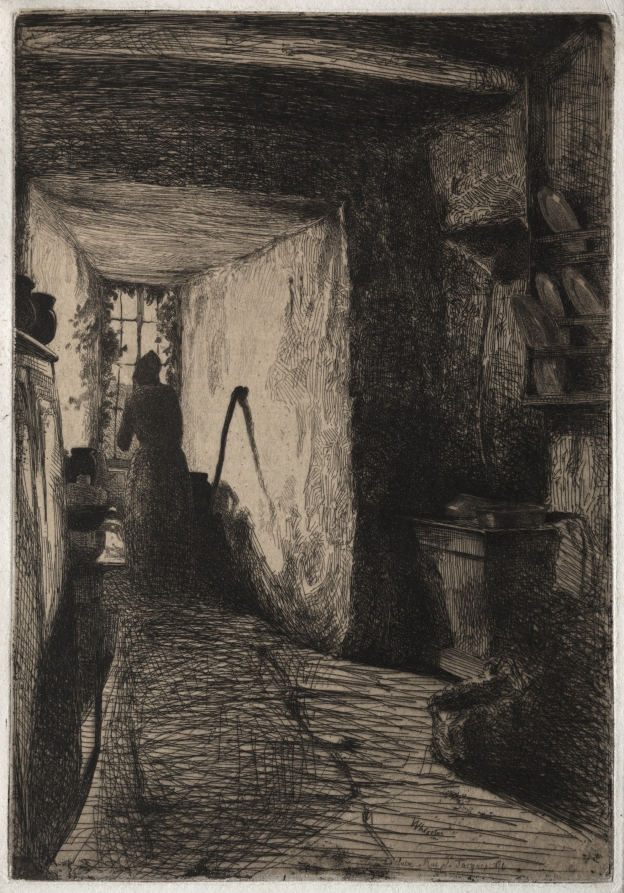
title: The Kitchen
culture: America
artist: James McNeill Whistler (American, 1834–1903)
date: 1858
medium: etching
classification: Print